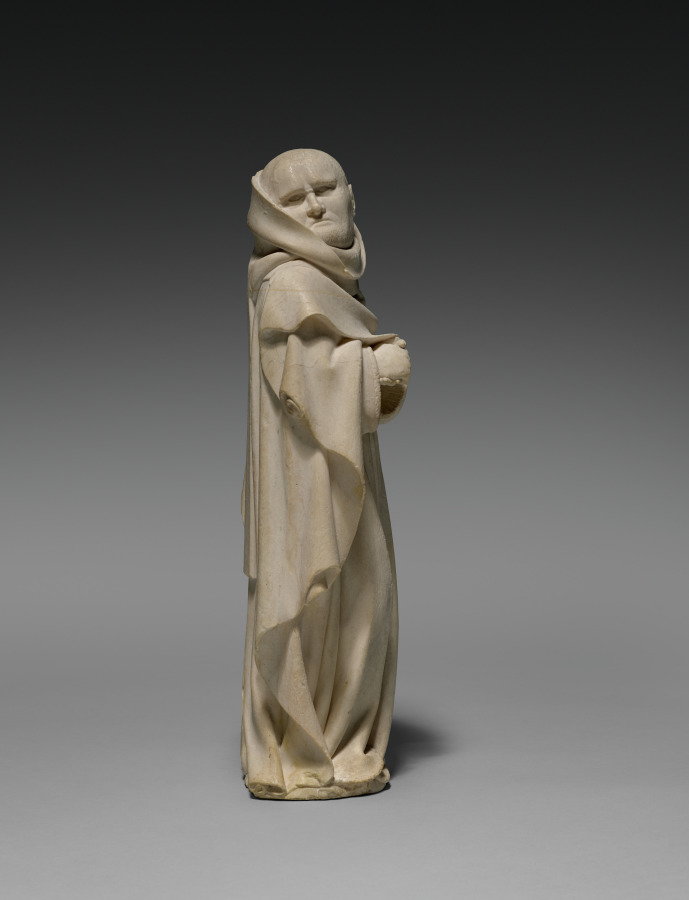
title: Mourner from the Tomb of Philip the Bold, Duke of Burgundy (1364–1404)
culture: Netherlands, active Dijon, 15th century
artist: Claus de Werve (Netherlandish, 1380–1439)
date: 1404–10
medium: vizille alabaster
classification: Sculpture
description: This figure comes from the tomb of Duke Philip the Bold from the church of Champmol near Dijon (Burgundy, France). Philip, who founded the monastery and designated it as his burial place, hired the best artists, many of whom came from the Netherlands. While the commission was given in 1381, the work was not completed until 1410, six years after the duke’s death. This mourner is unusual for the time because it is not carved as a static low relief on the pedestal of the tomb but interact with the viewers and their fellow procession members. The lifelike quality of the figure is due in large part to the alabaster. Its softness allowed artists to carve details into the material, and the transparent, milky white stone could also be polished to a high gloss.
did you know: The use of alabaster in the late Middle Ages began in the 1300s with court art in the circles of French kings, especially in the field of funerary sculpture.